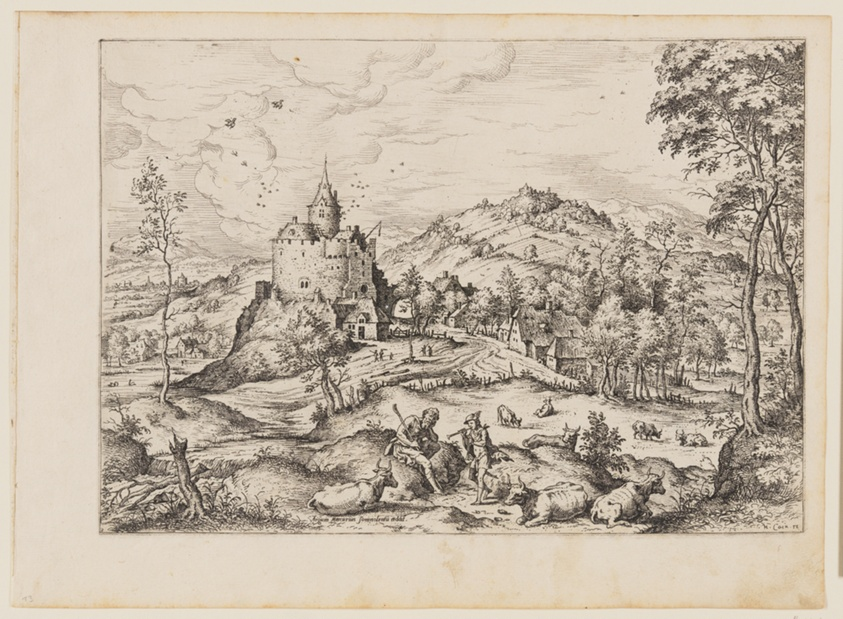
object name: Print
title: Mercury Lulling to Sleep Argus, from Landscapes with Biblical and Mythological Scenes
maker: Hieronymus Cock (Netherlandish, c. 1510–1570); after Matthys Cock (Netherlandish, c. 1505-1548)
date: 1558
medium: Etching on ivory laid paper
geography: Netherlands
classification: etching; paper; print; prints and drawing